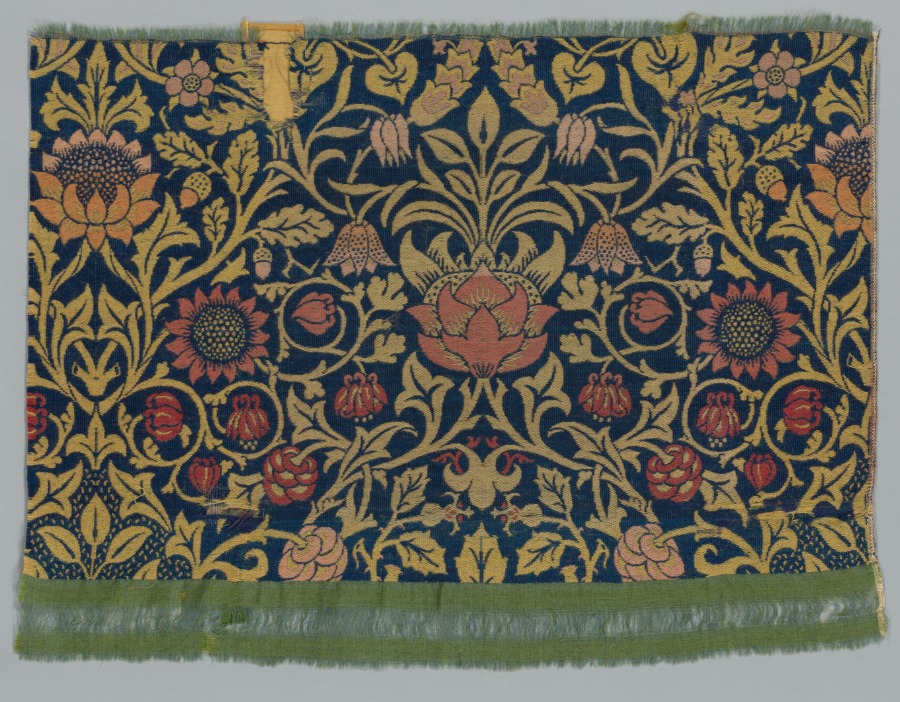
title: Violet and Columbine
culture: England, Surrey, Merton Abbey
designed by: William Morris (British, 1834–1896)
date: 1883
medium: Wool and mohair: jacquard loom woven weft-faced twill, double cloth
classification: Textile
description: Morris envisioned textiles such as Violet and Columbine hanging in heavy folds, the rich colors and flowing pattern suggesting a garden wall. He strongly preferred experimenting with natural dyes instead of using the garish chemical ones that had become standard in industrialized England. Even though organic dyes were expensive and scarce, and required dyers to revive old methods, they were less likely to fade in the light or during washing, and they were capable of producing more subtle tonal effects. A sense of the process of hand-weaving can be understood by looking at the back of this textile. The warp (up and down) threads are light blue and green—visible at the bottom. The textile was woven in long lengths that could be cut at these passages of loose thread. The weft (side to side) threads in several colors, including red, pink, yellow, and blue, are more visible from the back than the front, where they disappear into the pattern.